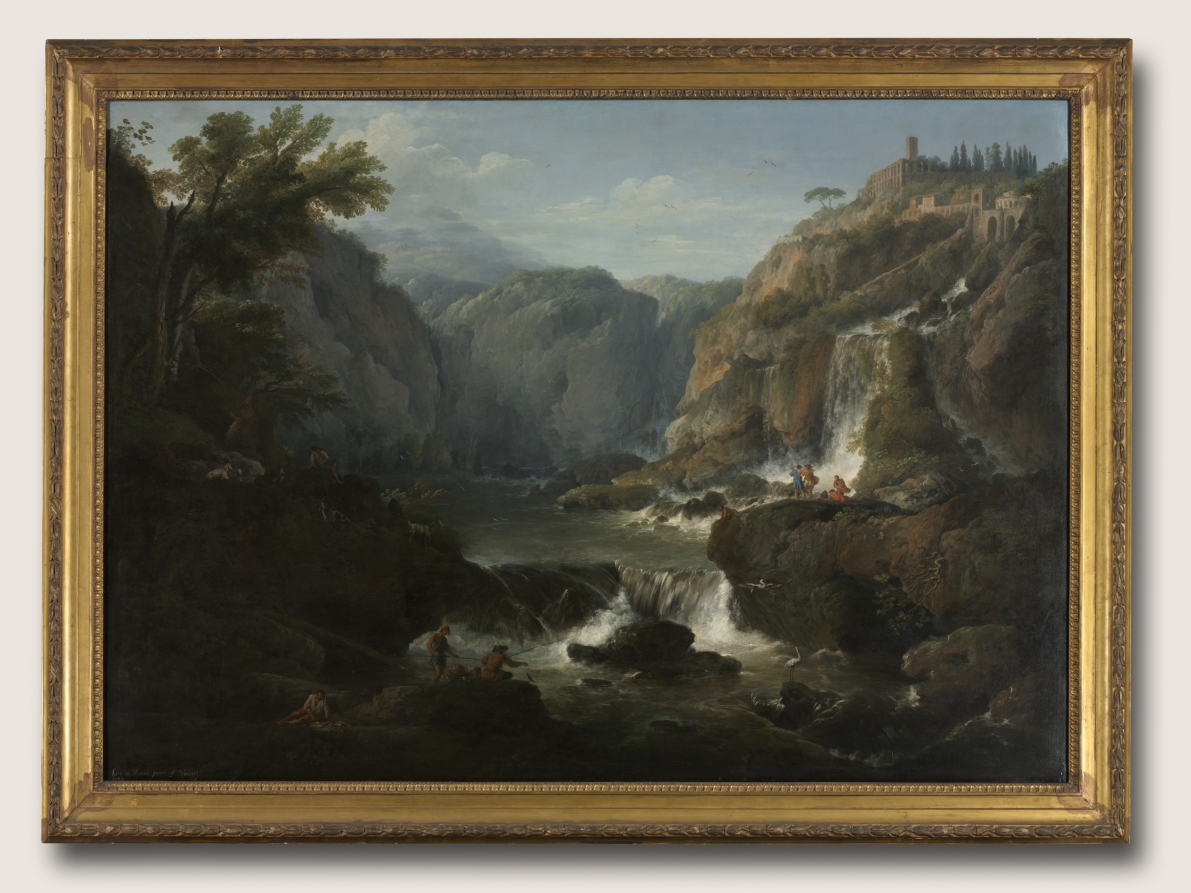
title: The Waterfalls at Tivoli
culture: France, 18th century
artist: Claude-Joseph Vernet (French, 1714–1789)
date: 1737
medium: oil on canvas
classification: Painting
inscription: Signed lower left: "fait a Rome par J. Vernet"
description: Likely Vernet's first major work during his study in Rome, this landscape demonstrates his signature style. Vernet preferred and is remembered for marine subjects and water is also a central theme in this painting. Vernet became the predominant French landscape painter of the 18th century, contributing to a long French tradition. While in Rome, he absorbed the Italian tradition of dramatic, rugged landscape paintings, established by Salvador Rosa in the 1600s. This influence is reflected in Vernet's presentation of the craggy rock formations and cascades that made Tivoli, a small town twenty miles east of Rome, famous. Vernet here synthesizes this style with the calmer pastoral mode, more typical of the French landscape tradition, with its roots in the work of Claude Lorrain. Vernet generally inserted elements of humanity in his work, here evident in the touches of civilization in the background and the fishermen in the foreground. Vernet enjoyed considerable popularity, evidenced by the fact that Napoleon's brother Lucien Bonaparte held this painting as a part of his impressive collection.